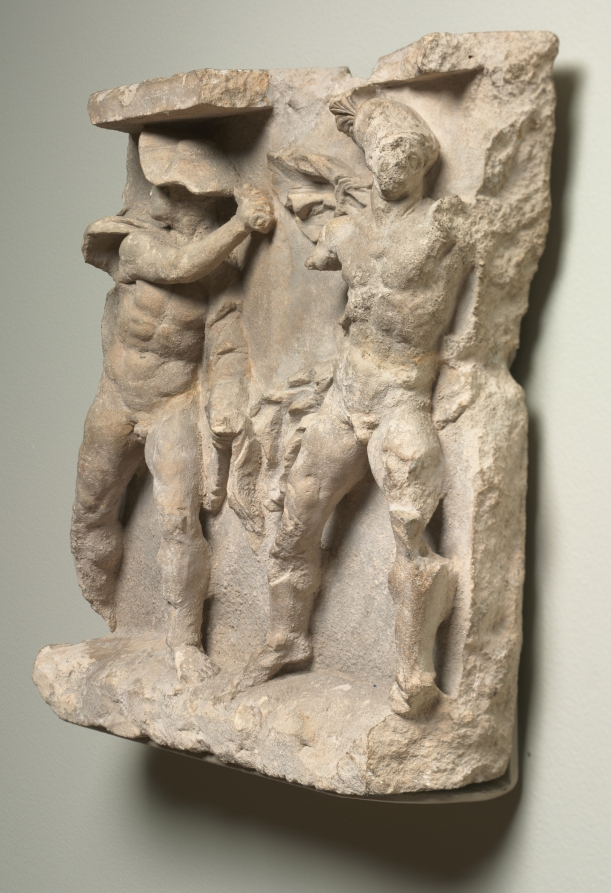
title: Relief of Striding Warriors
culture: Greek/South Italian, Taranto (ancient Taras)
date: 300–200 BCE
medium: limestone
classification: Sculpture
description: This carved limestone relief depicts two warriors striding to the right, one wearing a broad traveler's hat called a petasos and the other a Corinthian helmet. Each wears a short cloak called a chlamys over his left arm (now missing on the righthand warrior). The left warrior looks back, perhaps toward a horseman, since a small fragment of a horse’s foreleg remains behind his knee. The strong diagonals of the warriors contrasted with the flowing drapery of their cloaks demonstrates a dynamism characteristic of Hellenistic relief sculpture.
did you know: This relief was likely part of a larger frieze that decorated a naiskos, or small temple, above a grave.